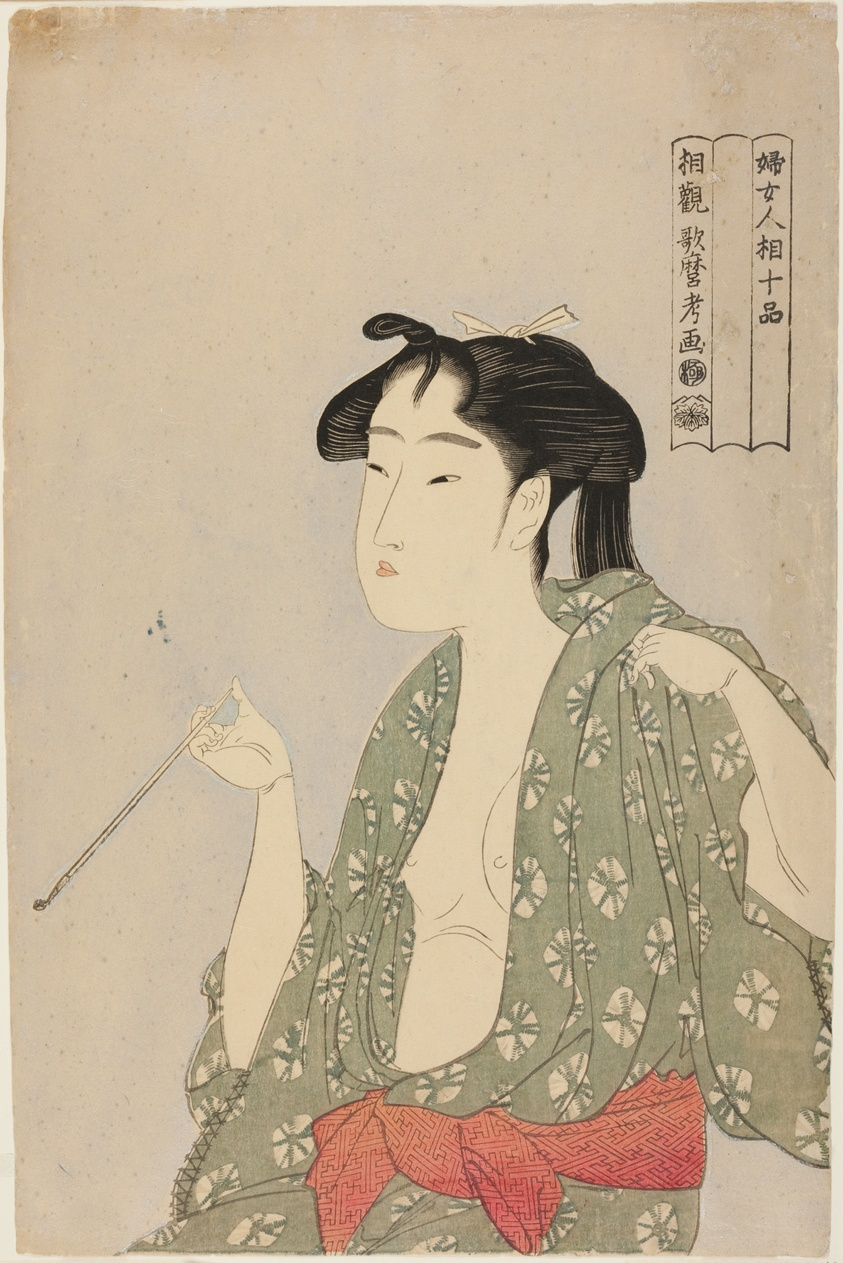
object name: Print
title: Woman Exhaling Smoke from a Pipe, from the series "Ten Classes of Women’s Physiognomy (Fujo ninso juppon)"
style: Japanese (culture or style)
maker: Kitagawa Utamaro 喜多川 歌麿; Japanese, 1753 (?)-1806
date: c. 1792/93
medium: Color woodblock print; oban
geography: Japan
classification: woodblock print; print; asian art